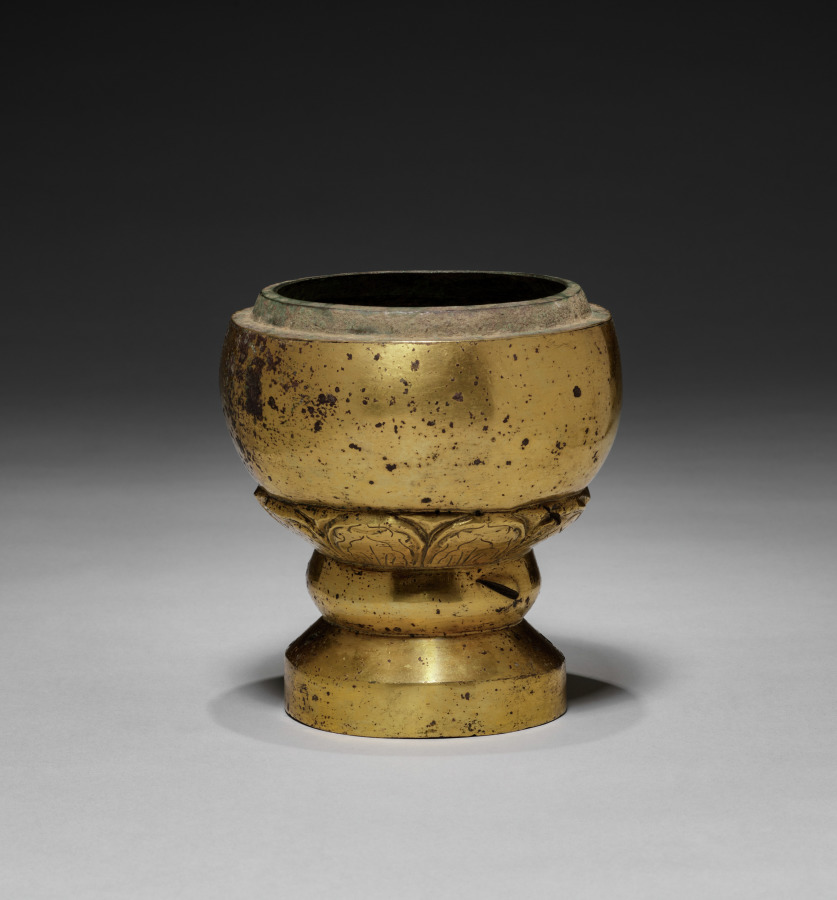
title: Censer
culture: China, Tang dynasty (618-907)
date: early 600s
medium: gilt bronze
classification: Metalwork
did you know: The censor has a lotus-shaped pedestal.